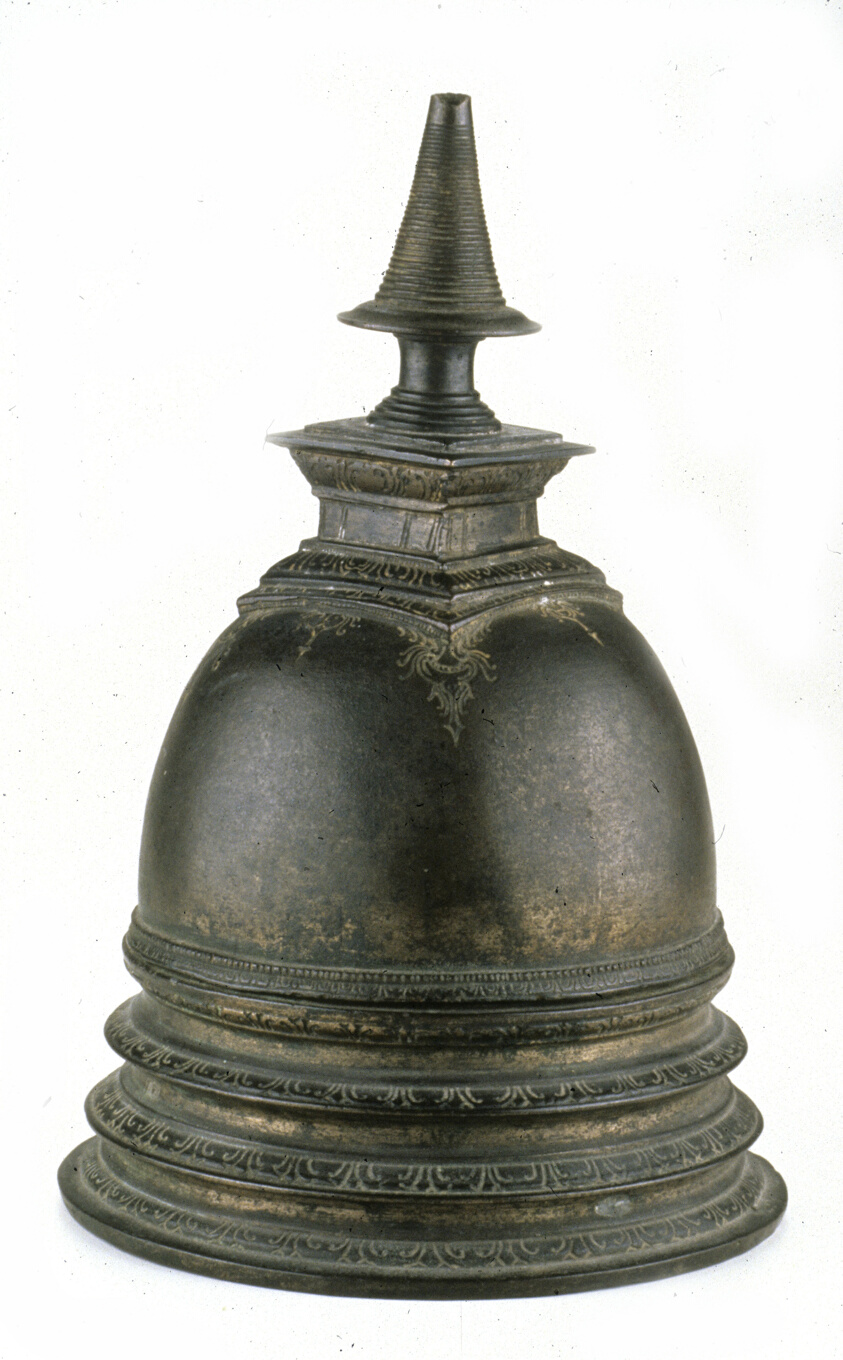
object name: Sculpture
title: Stupa Reliquary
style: South Asian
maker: Sri Lanka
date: About 14th/15th century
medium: Bronze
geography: Sri Lanka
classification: reliquary; container; bronze; metal; asian art; sculpture